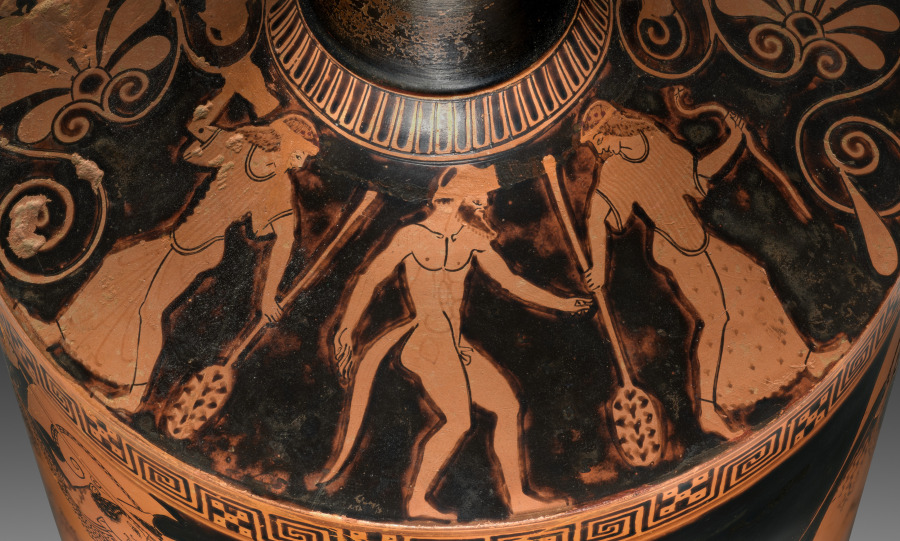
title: Red-Figure Lekythos (Oil Vessel): Athena Slaying Giant (body); Satyr between Maenads (shoulder)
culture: Greek, Attic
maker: attributed to Berlin Painter (Greek, Attic, active c. 505–460 BC)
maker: attributed to Painter of Goluchow 37 (Greek, Attic, active c. 490–460 BC)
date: c. 490 BCE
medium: ceramic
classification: Ceramic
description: The two separate areas of figural decoration on this vase have been attributed to different painters: the small satyr and maenads on the shoulder to the Berlin Painter; and the larger figures of Athena and the slain Giant Enkelados on the body to the Painter of Goluchow 37. Scholars have named these two painters, whose actual names remain unknown, after other vases they have painted, now in Berlin and Warsaw. The victory of Athena and the Olympian gods over the Giants has been interpreted as a metaphor for the Greek victory over the Persians around the time this vase was made. Thus, although Enkelados appears as a fully armed warrior, he falls in utter and complete defeat—bleeding from multiple wounds, eyes rolling back, sword dropping from his hand.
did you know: First attributed to Douris, this vase is now thought to have been painted by two anonymous painters.